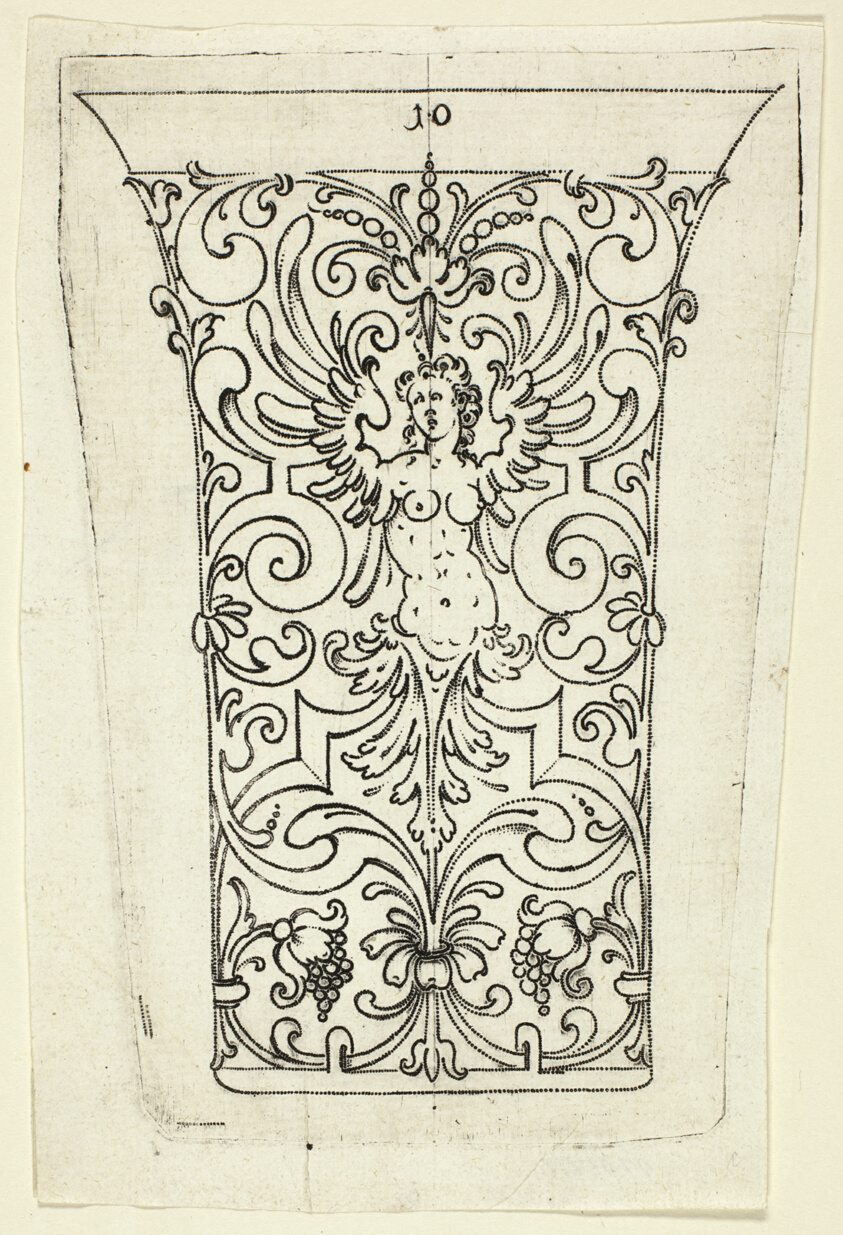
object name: Print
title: Plate 10, from twenty ornamental designs for goblets and beakers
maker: Master A.P. (German, active early 17th century)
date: 1604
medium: Punch engraving in black on ivory laid paper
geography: Germany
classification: engraving; print; prints and drawing